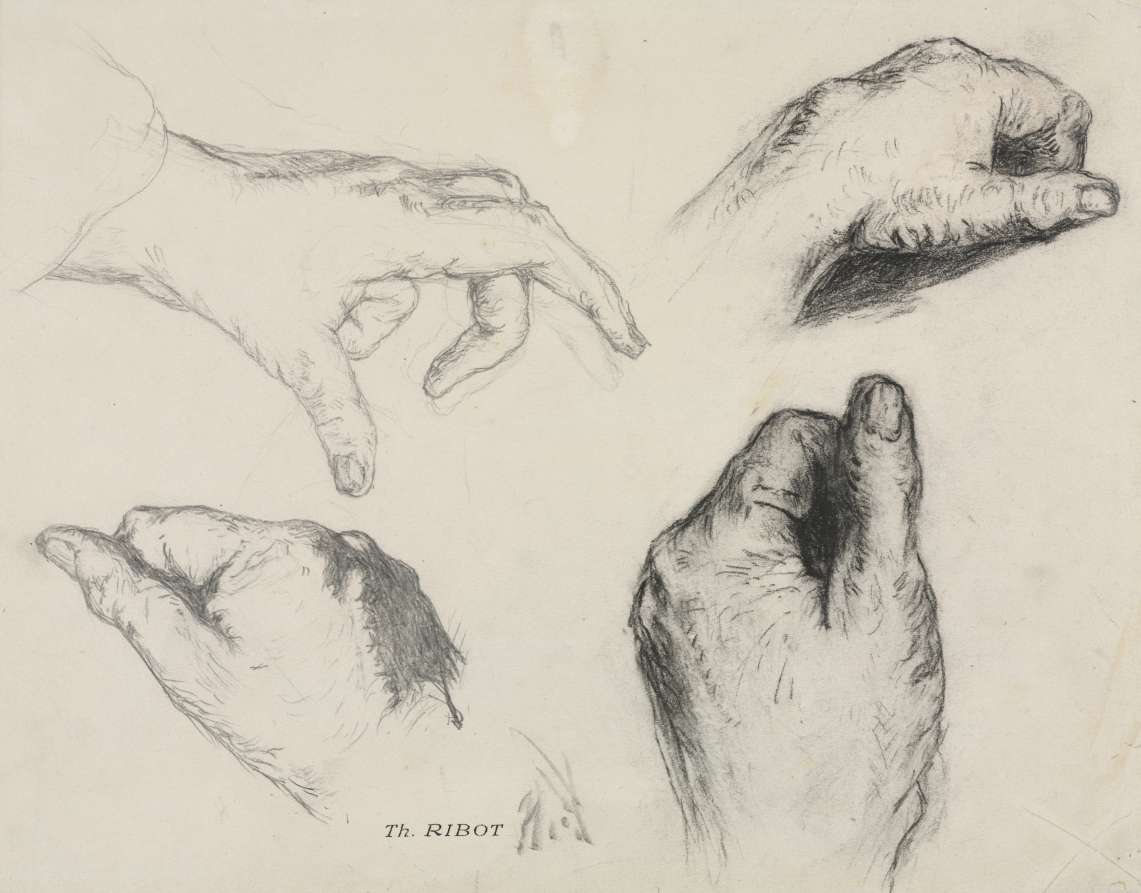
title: Study of Hands (recto); Study of a Woman's Hand (verso)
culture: France, 19th century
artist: Théodule Ribot (French, 1823–1891)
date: 1800s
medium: black chalk and graphite (recto)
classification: Drawing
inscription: inscribed in black ink, lower center; "Th. Ribot (estate stamp)